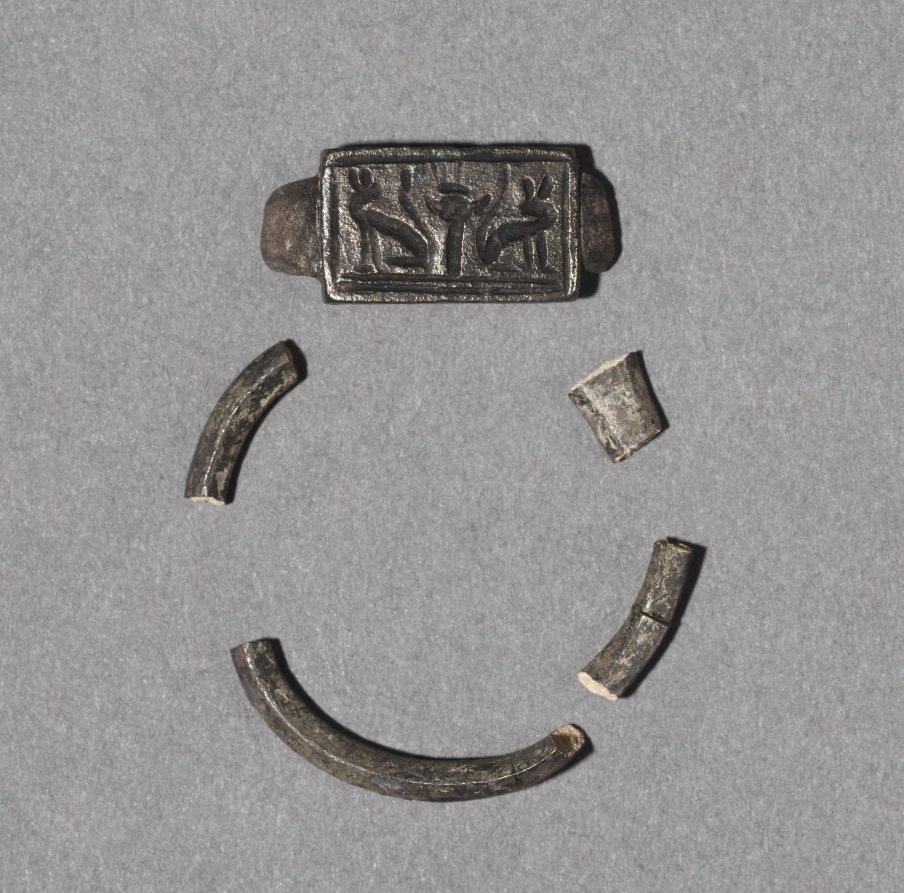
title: Finger Ring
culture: Egypt, Third Intermediate (1069–715 BCE)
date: 1069–715 BCE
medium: silver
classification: Jewelry